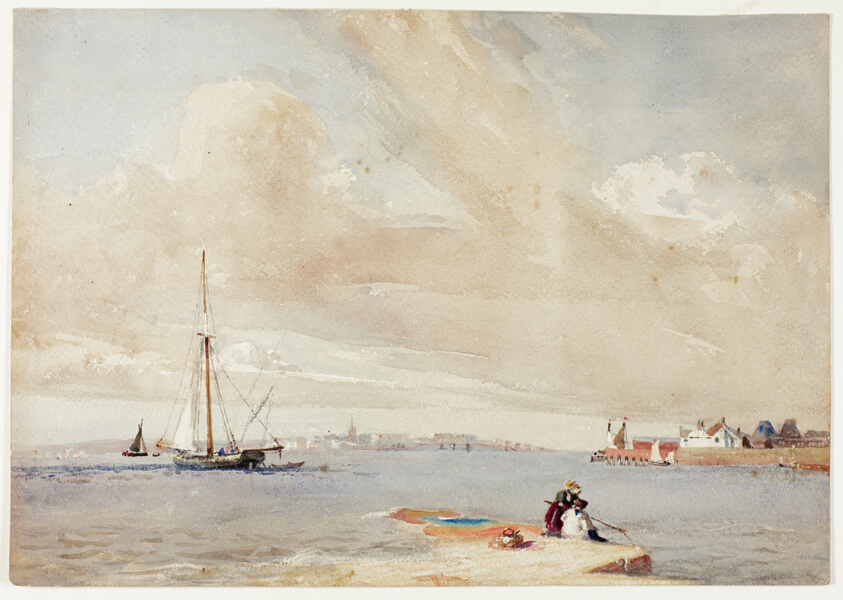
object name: Drawing and Watercolor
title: Birkenhead from Herculaneum Potteries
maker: Attributed to Eliot Thomas Yorke; English, 1805-1885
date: 1834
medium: Watercolor over traces of graphite, on ivory wove paper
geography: England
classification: watercolor; drawings (visual works); prints and drawing